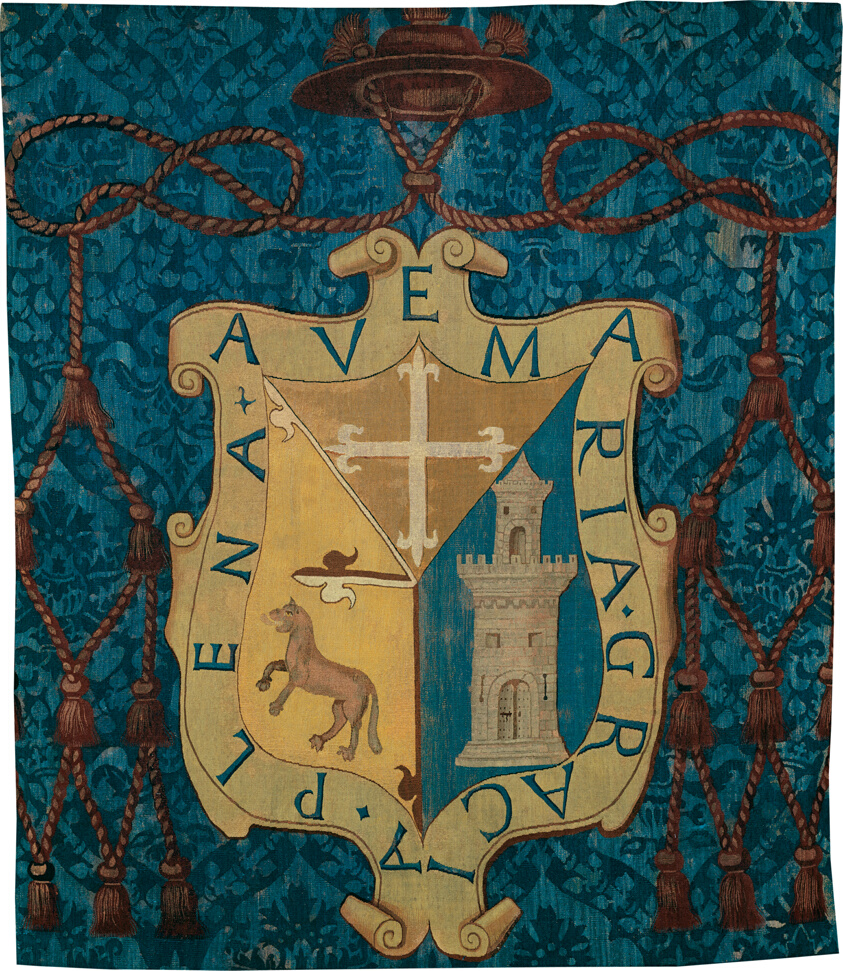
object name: Textile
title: Armorial with an Unidentified Coat of Arms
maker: Flanders, possibly Sint-Truiden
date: c. 1550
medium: Wool and silk, slit and double interlocking tapestry weave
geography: Flanders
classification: weaving - tapestry; textile